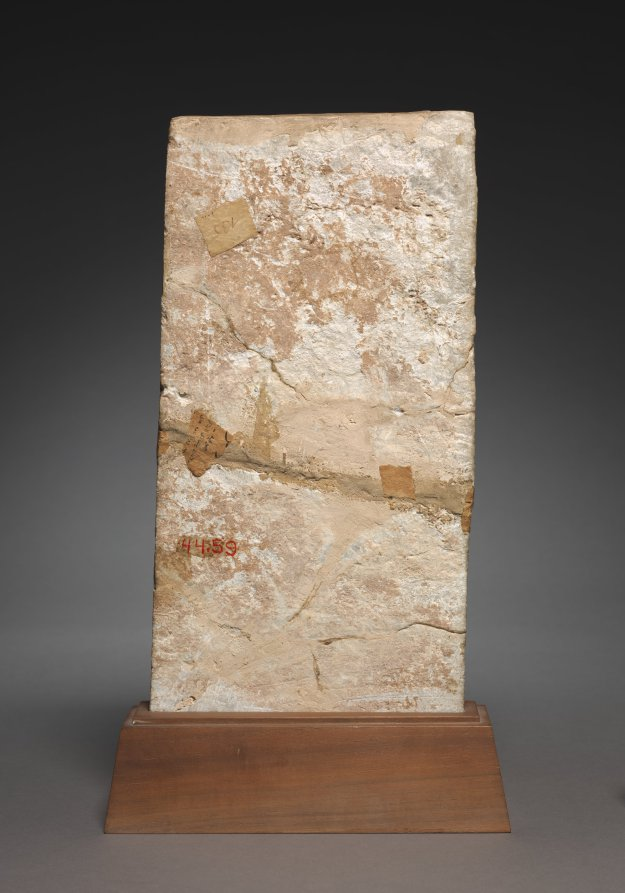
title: Tombstone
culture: Iran, Nishapur, 10th century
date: 900s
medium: limestone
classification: Sculpture